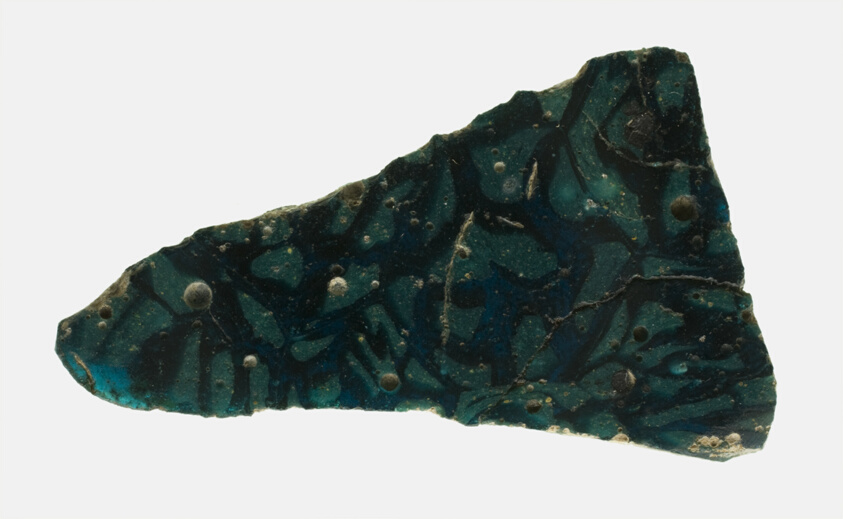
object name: Decorative Arts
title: Fragment of a Revetment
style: roman (ancient, style or period), ancient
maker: Roman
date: 1st century BCE–1st century CE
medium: Glass, mosaic glass technique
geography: Roman Empire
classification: fragment; decorative arts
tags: decoration